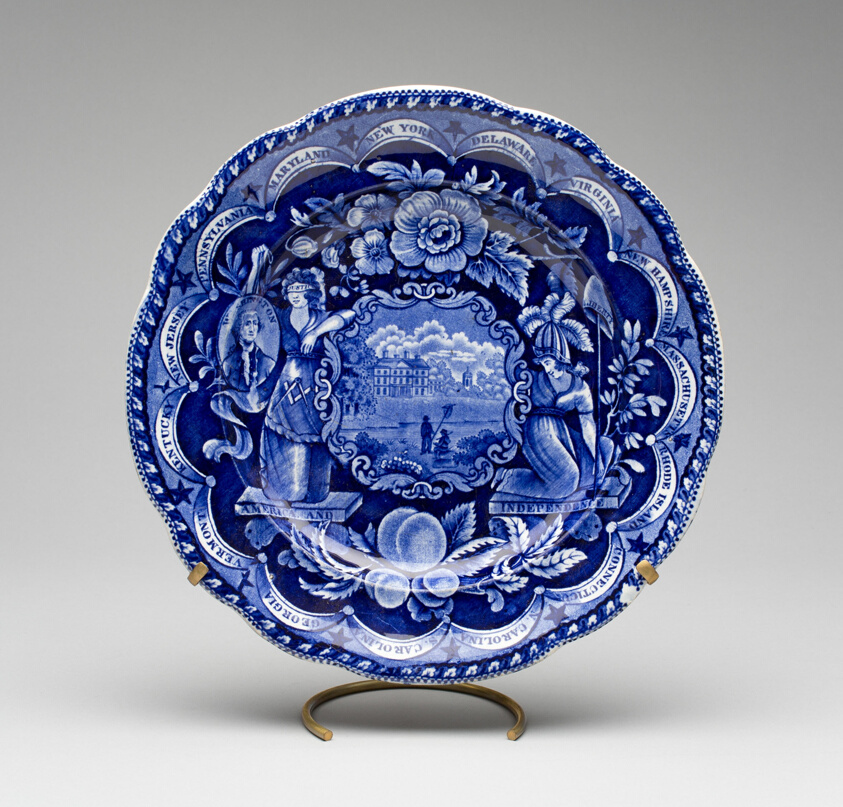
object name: Decorative Arts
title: Plate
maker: James and Ralph Clews; English, active 1818–36; Made for the American market; West Midlands, Stoke-on-Trent, England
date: c. 1826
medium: Earthenware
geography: Staffordshire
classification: plate (general, dish); earthenware; dish (vessel); american decorative arts; ceramics; decorative arts